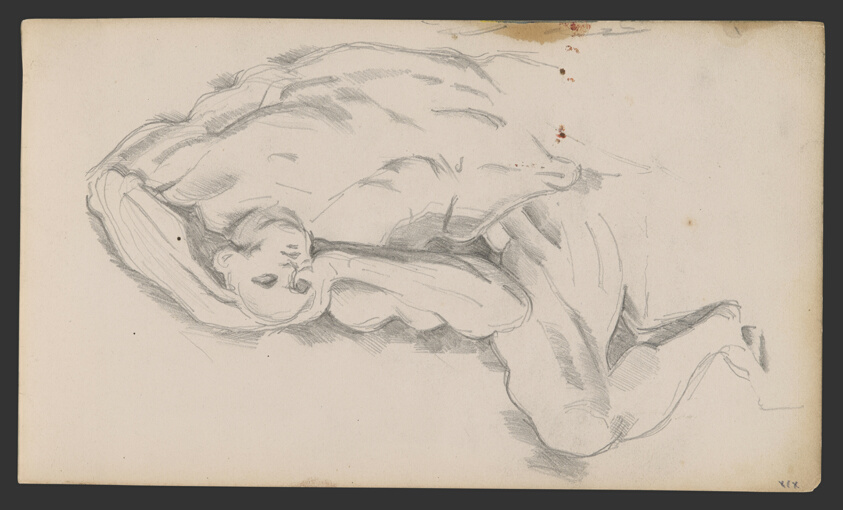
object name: Drawing and Watercolor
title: Sketchbook No. 2 (L'Estaque)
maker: Paul Cézanne; French, 1839-1906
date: 1875–86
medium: Graphite and pen and ink drawings on paper, bound into a book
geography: France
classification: sketchbook; graphite; prints and drawing; paper